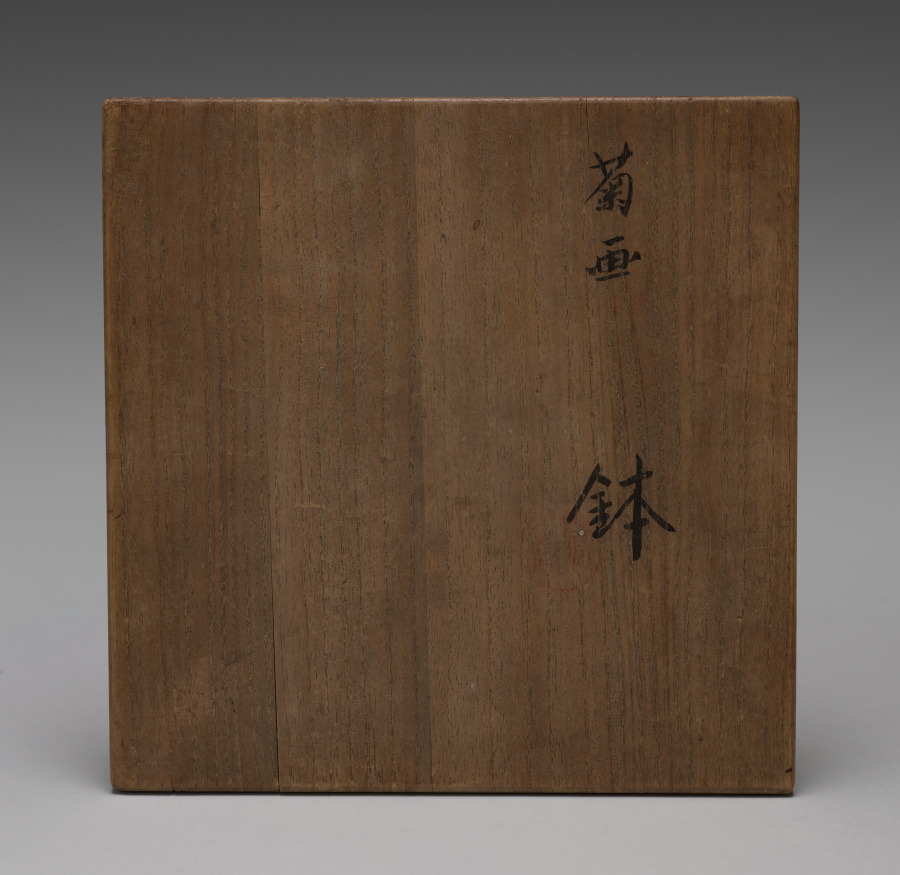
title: Bowl with Chrysanthemums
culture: Japan, Taishō period (1912–26) or Shōwa period (1926–89)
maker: Seifū Yohei IV (Japanese, 1872–1951)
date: 1914–46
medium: Stoneware with underglaze iron oxide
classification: Ceramic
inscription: 清風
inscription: 菊画/ 鉢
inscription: The inside of the box lid has a seal indicating that the bowl was included in a renewal opening of the gallery Manjudo in Tokyo.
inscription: 清風造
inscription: 成山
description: The chrysanthemums in underglaze iron oxide of this bowl of Kyoto ware have a casual feel, which is emphasized by the bowl's shape. When held, the its slightly ridged body would gently massage one’s palms, contributing to the sensory, tactile experience of the piece and possibly generating a sense of comfort and ease. The inside of the box lid has a seal indicating that the bowl was included in a renewal opening of the gallery Manjudo in Tokyo.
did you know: Stoneware works of this type are classified as Kyoto ware, after the city where the style developed.